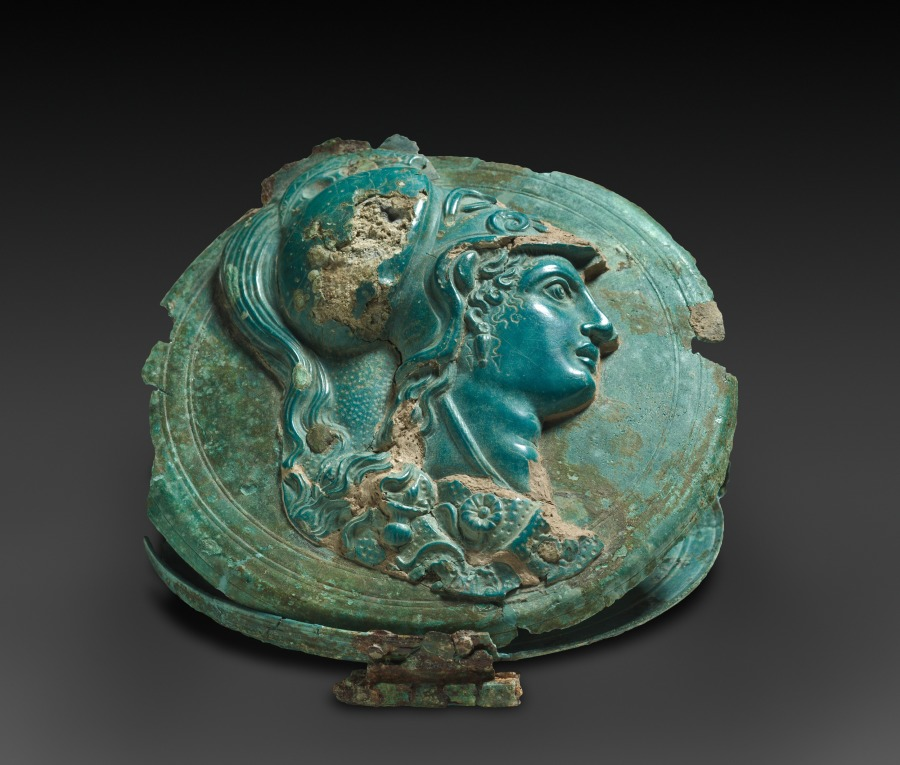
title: Box Mirror with Head of Athena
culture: Greece, Hellenistic period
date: 330–270 BCE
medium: bronze, partially gilt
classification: Metalwork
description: The ancient Greek box mirror resembles a modern, hinged makeup compact in design. While the actual mirror is the top of the bottom half of the box—a highly polished cast-bronze disk—the cover often bears relief decoration. This example features a helmeted head of Athena, a virgin war goddess not typically associated with implements of beauty. Several other aspects suggest that this Athena may have been repurposed from another object in antiquity: the striking difference in patina between relief and case; the irregular (noncircular) shape; and the method of attachment, with rivets through the relief rather than solder.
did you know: Athena, the virgin goddess of war and craft, rarely appears on mirrors.